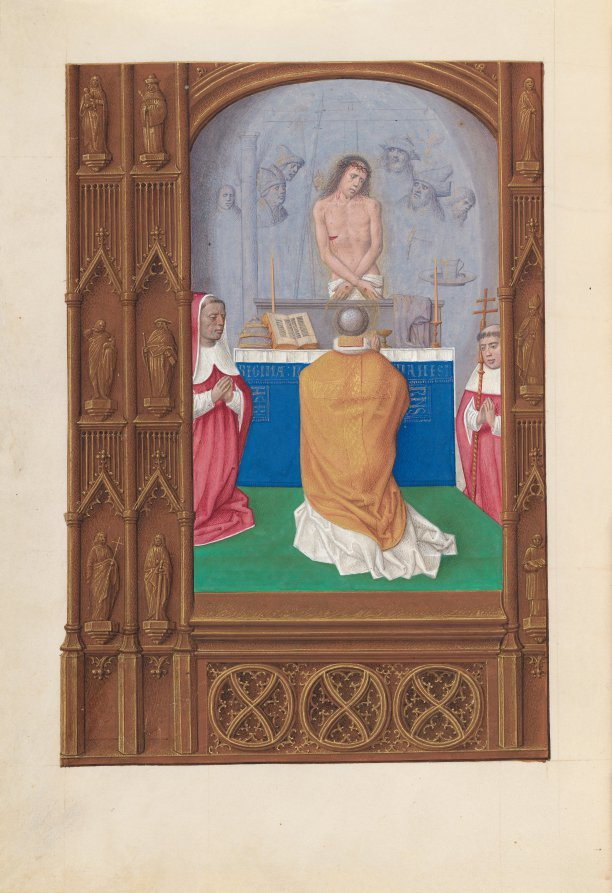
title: Hours of Queen Isabella the Catholic, Queen of Spain: Fol. 264v, Mass of St. Gregory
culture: Flanders, Ghent and Bruges, late 15th century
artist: Master of the First Prayerbook of Maximillian (Flemish, c. 1444–1519)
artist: and Associates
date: c. 1500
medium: ink, tempera, and gold on vellum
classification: Bound Volume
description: This manuscript was illuminated by a circle of at least five highly organized manuscript painters active in the Flemish cities of Ghent and Bruges. The principal illuminator was Alexander Bening, who painted the majority of the book's miniatures. Manuscripts produced by this circle of artists are renowned for the decoration of their borders, which typically feature a rich variety of realistically-painted flowers, birds, and butterflies. This prayer book, called a book of hours, was intended not for a cleric, but for the private devotions of a lay person-in this case, Isabella the Catholic, Queen of Spain (1451-1504). Isabella's coat of arms embellishes the book's frontispiece. It is unlikely that the book was commissioned by the Queen herself; rather, she probably received it as a diplomatic gift from someone courting her patronage, perhaps Cardinal Francisco Jimenez de Cisneros. A Franciscan friar, Jimenez was dependent upon Isabella for his advancement, first to the post of Queen's confessor in 1492, and then to Archbishop of Toledo in 1495.